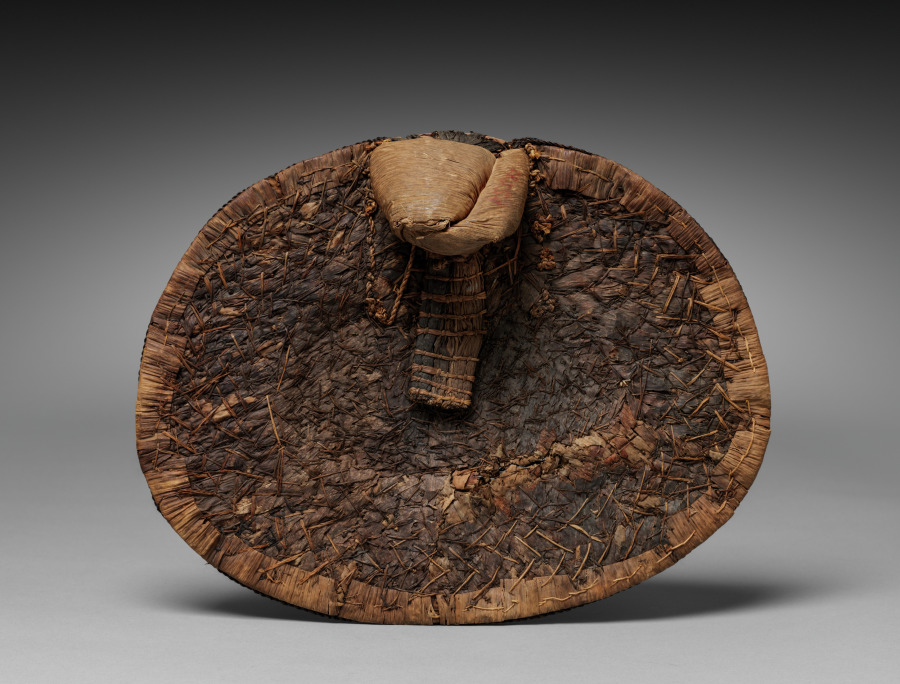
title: Back Skirt/Sitting Pad (negbe)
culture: Africa, Central Africa, Democratic Republic of Congo, Mangbetu-style makers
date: by 1928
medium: Plant fibers and dye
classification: Garment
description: Egbe (singular: negbe) were fashionable and practical garments aristocratic Mangbetu women made for special occasions. Worn over a skirt, it tied onto a girdle along with a frontal “apron.” The curved interior piece rested on the lower back. Thickly woven, flexible natural fibers bent with the body, cushioning the wearer’s behind when sitting. When the woman was standing, the decorated flat portion faced outward, showing off bold geometric motifs. Egbe were among items sold to foreigners at the Mangbetu king’s encouragement as the Mangbetu actively constructed their self image for outsiders during the 1920s and 1930s.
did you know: A contemporary fashion in 1929, when it was purchased or collected, this egbe is now a historical document of past styles.